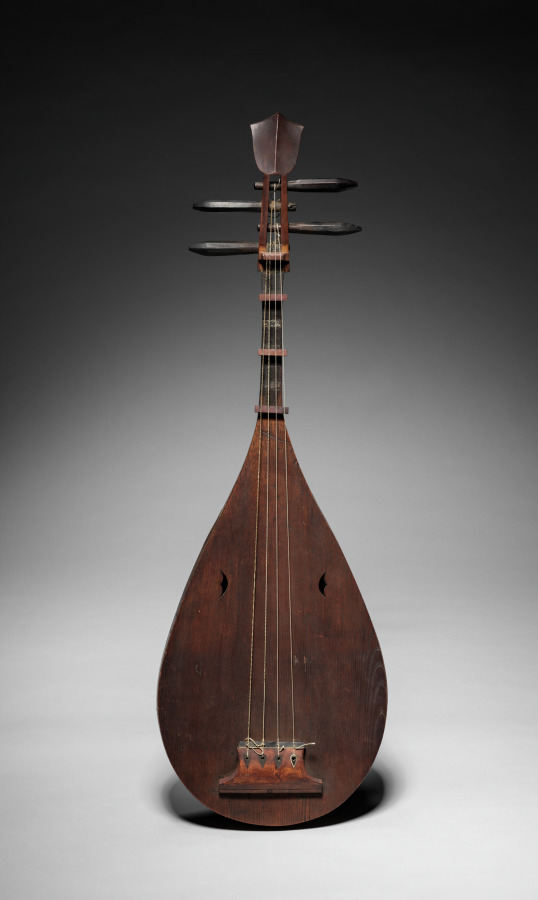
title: Heike Biwa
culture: Japan, Meiji period (1868–1912)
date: c. 1850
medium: Wood, bone, silk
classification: Musical Instrument